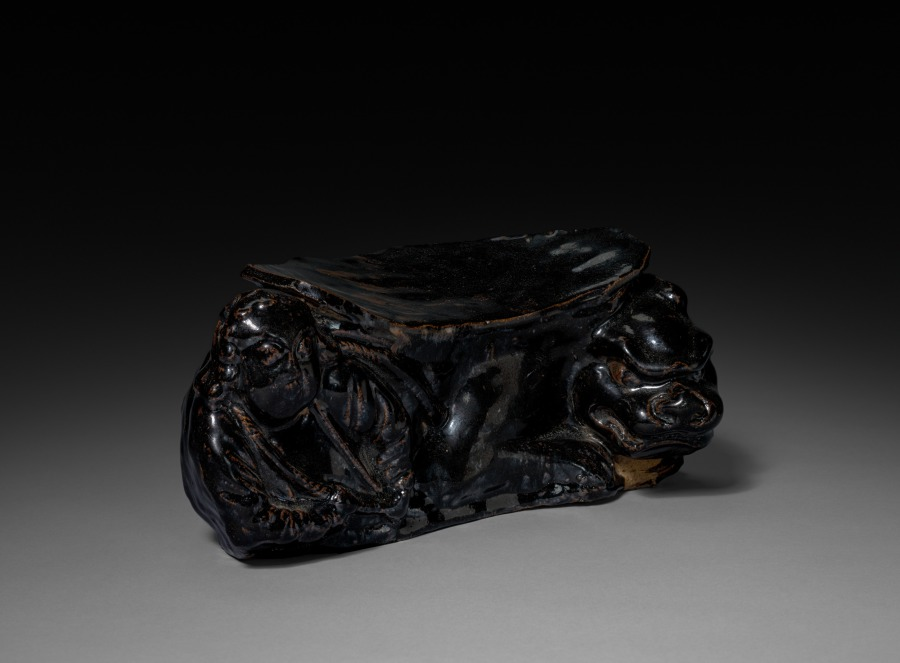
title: Pillow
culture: China, Yuan dynasty (1271-1368)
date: 1100s-1200s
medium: Glazed stoneware, Cizhou ware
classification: Ceramic